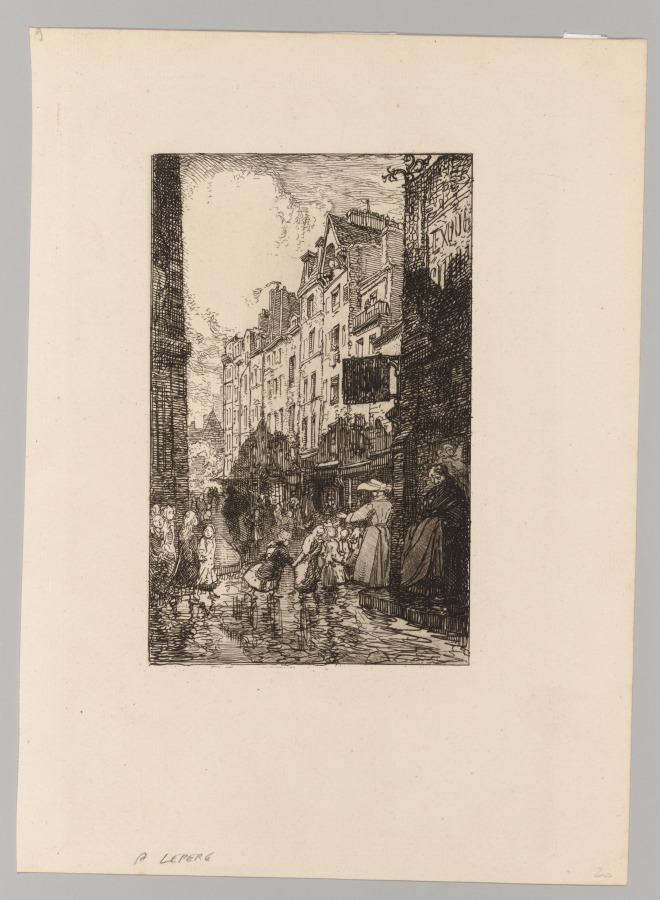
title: La Biévre, Les Gobelins, Saint-Séverin: Le Quartier Saint-Séverin: La Rue des Prêtres Saint-Séverin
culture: France, 19th century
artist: Auguste Louis Lepère (French, 1849–1918)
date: 1901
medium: etching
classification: Print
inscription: Bottom margin, in graphite: A LEPERE (not in artist's hand); verso, in graphite: Lepere; Sister (upside down)